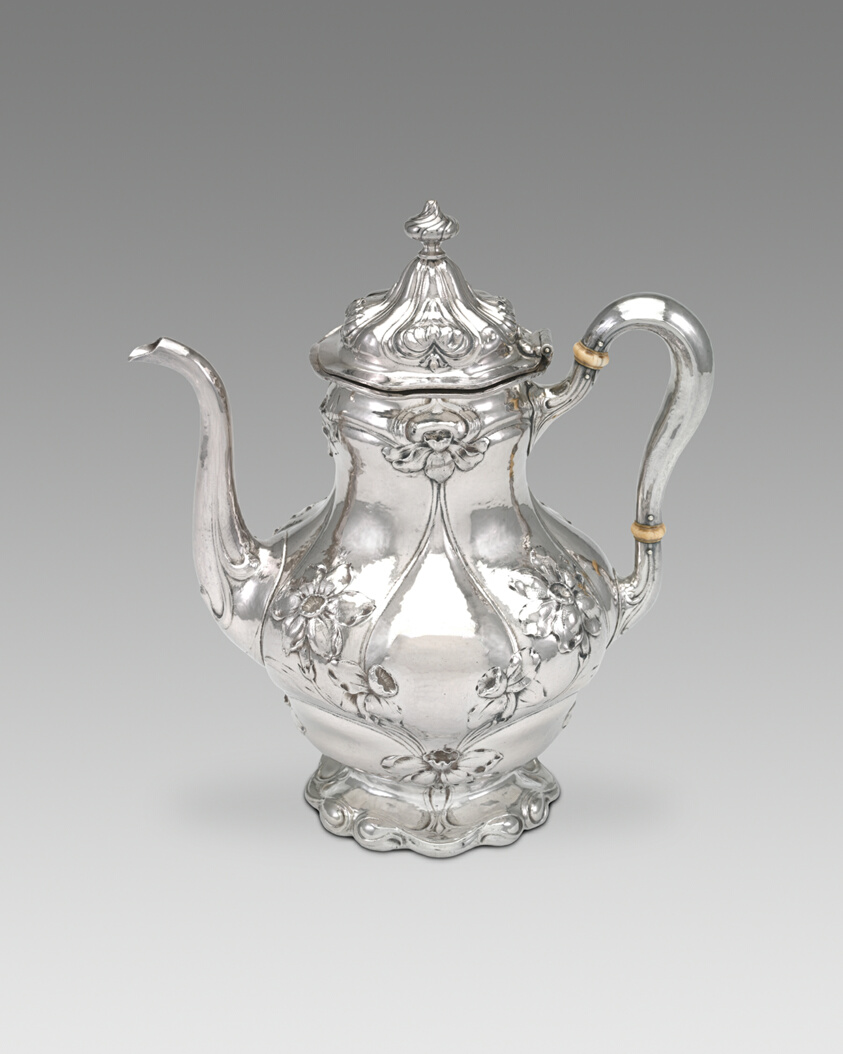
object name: Metalwork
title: Coffee Pot (part of a set)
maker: Gorham Manufacturing Company (American, founded 1831); Providence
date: 1900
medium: Silver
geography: Providence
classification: coffeepot; silver; american decorative arts; american arts; decorative arts